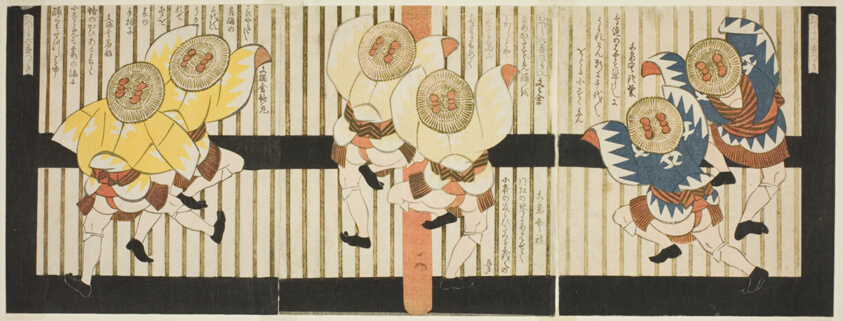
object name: Print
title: Sparrow dancers, from "A Set of Six for the Katsushika Circle (Katsushika rokuban tsuzuki)"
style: Japanese (culture or style)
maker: Yashima Gakutei (Japanese, 1786 (?)-1868)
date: c. 1827/28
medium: Color woodblock print; bottom three sheets of shikishiban hexaptych, surimono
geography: Japan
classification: woodblock print; print; asian art